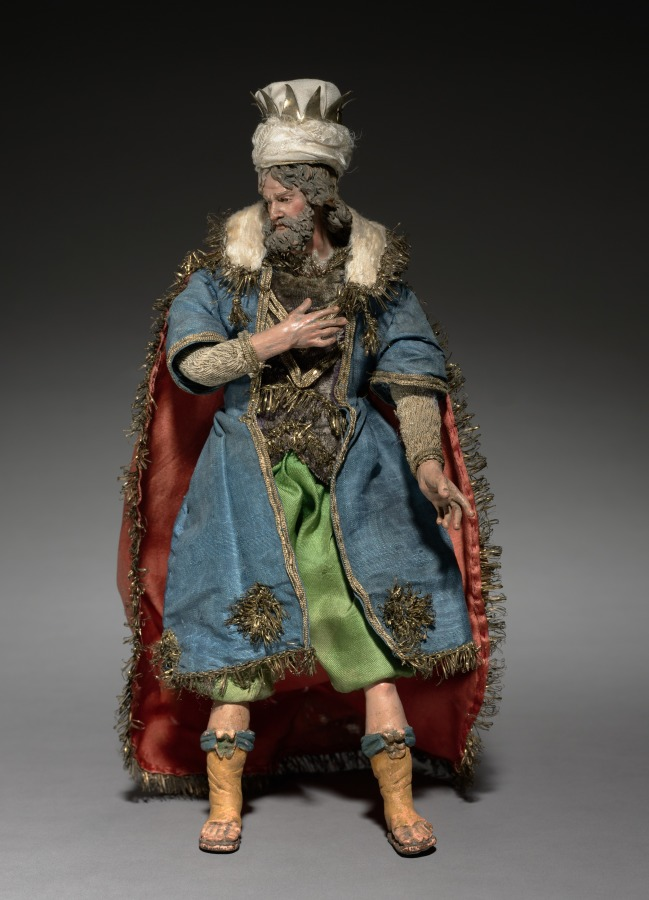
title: Figure from a Crèche: Magus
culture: Italy, Naples, late 18th-early 19th century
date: 1780–1830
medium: painted wood and terracotta with various textiles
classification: Sculpture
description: The practice of creating scenes of the Nativity for the home dates from the early 1700s in Italy, where people began to set up doll-like figures of about a foot or less in height. The custom was particularly popular in Naples around 1800, where crèche scenes (crèche means cradle, or crib) included many figures, whose heads and hands of painted terracotta, stuffed cloth bodies, and clothing adapted from contemporary local costumes gave them an amazingly realistic character. Representations of the birth of Jesus can be traced to the first few centuries of Christianity. Both living creatures and sculptural depictions of them were used from early times. By the late middle ages it was customary to create life-size figures of wood or stone, naturalistically painted, to represent the characters who participated in the events of Jesus's early life. These sculptures were then arranged in scenes illustrating one or both of the most important of these events, the Adoration of the Shepherds and the Adoration of the Magi-the three kings from the East who came to pay homage to the Christ child. Used in churches, these large figures were especially popular in Italy, Central Europe, Spain, and Portugal. This Object in Focus presentation was organized by Henry Hawley, Curator of Renaissance and Later Decorative Arts and Sculpture.